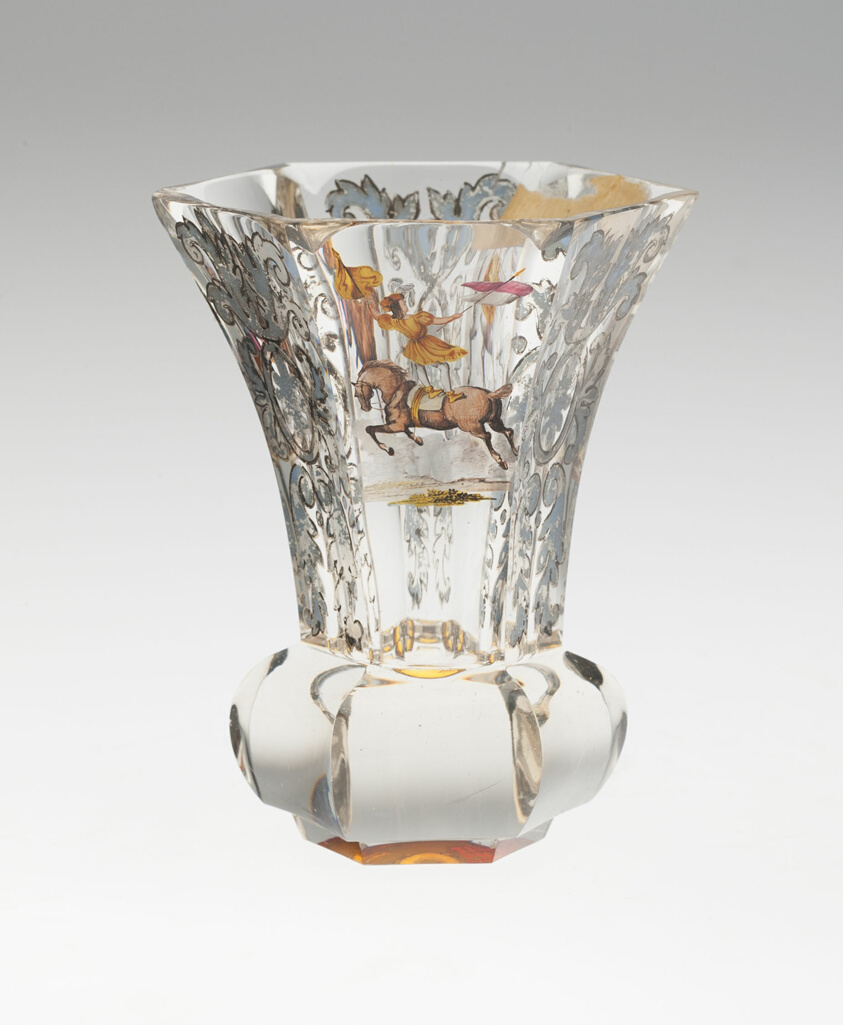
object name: Glass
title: Beaker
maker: Bohemia, Czech Republic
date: c. 1830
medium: Glass; colorless, blown, cut, stained, enameled and gilding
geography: Bohemia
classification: drinking vessel; glass; european decorative arts